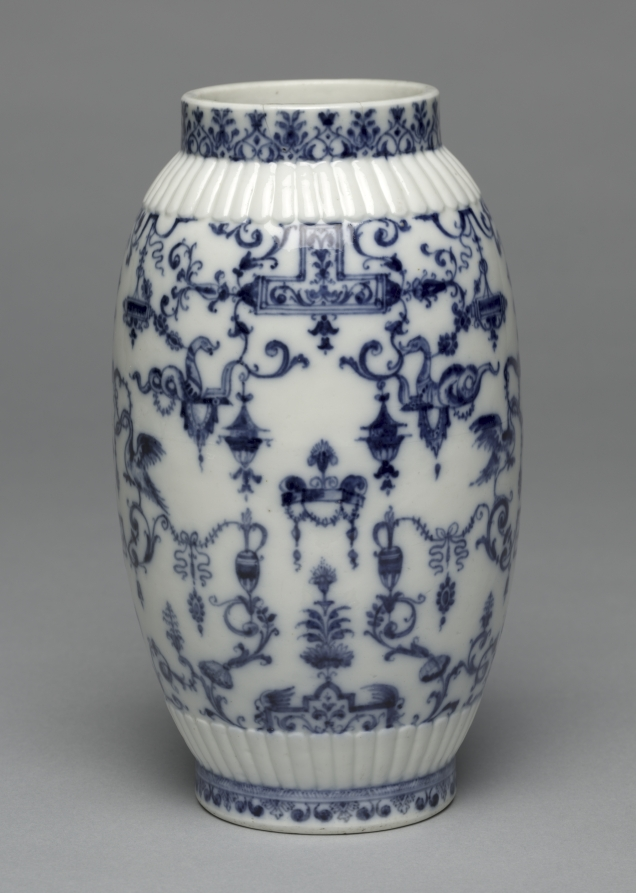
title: Vase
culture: France, St. Cloud, late 17th-early 18th Century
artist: attributed to Saint Cloud Porcelain Factory (French)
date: c. 1695–1700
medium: Molded soft-paste porcelain with blue underglaze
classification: Ceramic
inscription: "55"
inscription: "KR paiz"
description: This vase’s decoration demonstrates the converging influence of Chinese and Italian art on French porcelain manufacture. Early production at the Saint-Cloud factory was inspired by blue and white Chinese porcelain. Books of grotesque designs popular during the Italian Renaissance and published by Jacques Androuet Du Cerceau provided models for this vase’s ornament including its interlacing garlands, swans, and snakes.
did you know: This vase may have been part of a garniture, a decorative set of matching porcelain intended to be displayed together.